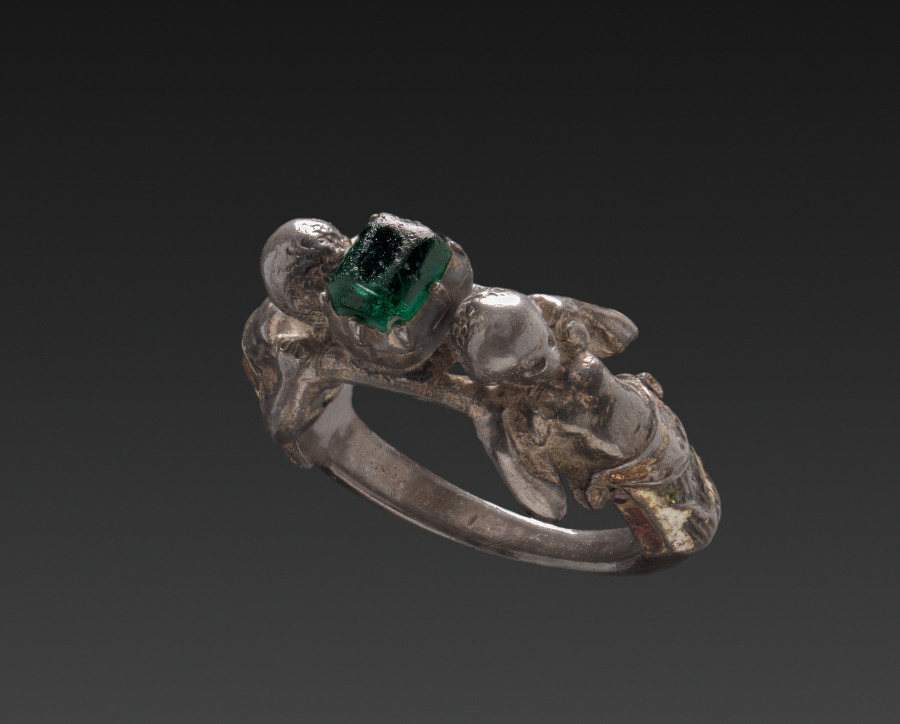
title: Ring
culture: Italy, 18th century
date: 1700s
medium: silver and emerald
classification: Jewelry